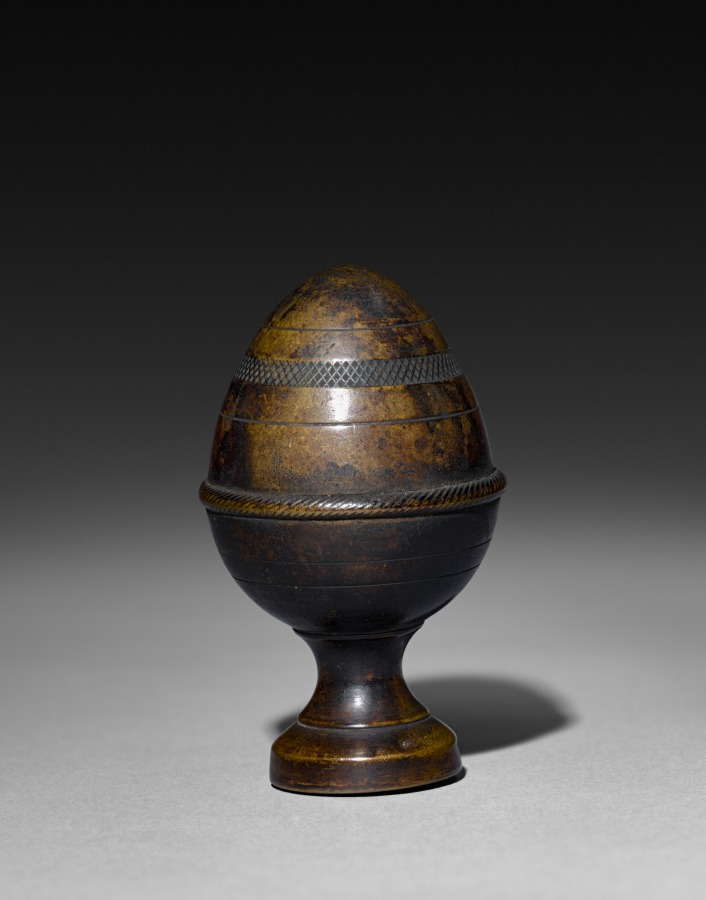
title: Ornamental Finial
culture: France, late 18th century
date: late 1700s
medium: bronze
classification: Metalwork